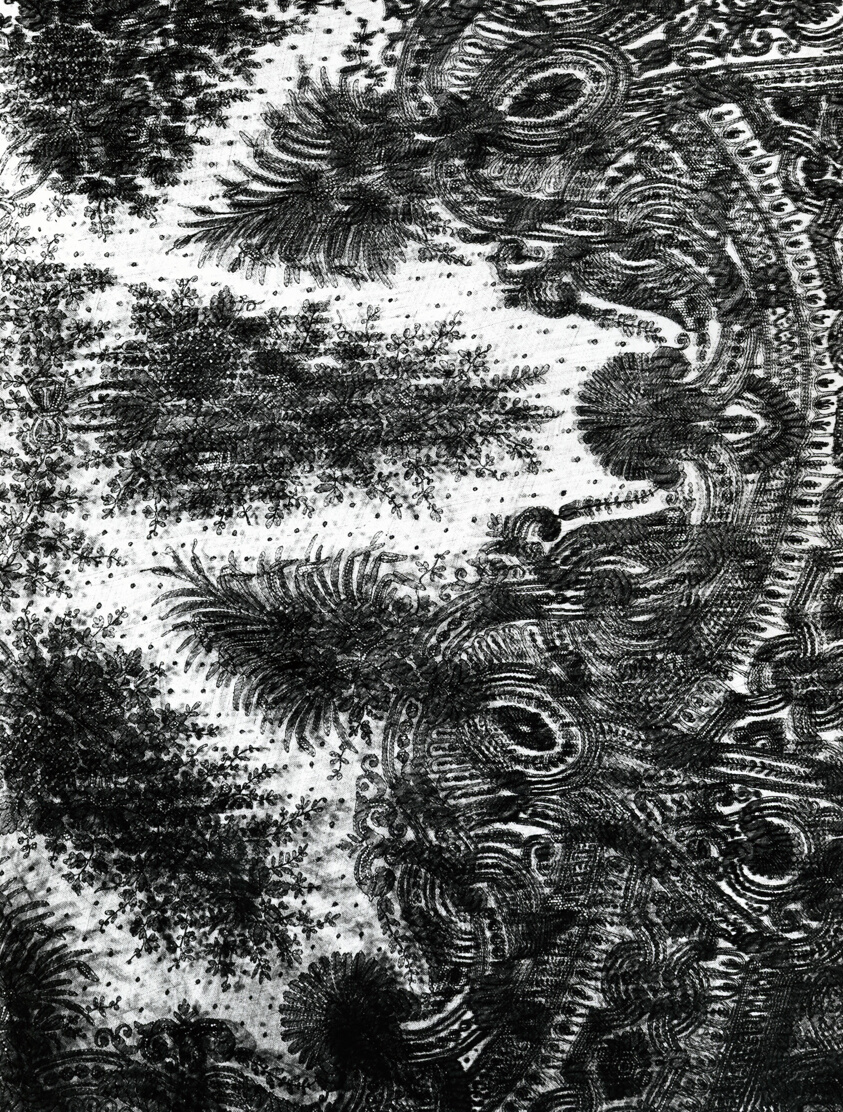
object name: Textile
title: Cape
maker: England or France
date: 1860s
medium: Silk and mohair, Pusher machine lace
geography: England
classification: textile; lace - machine